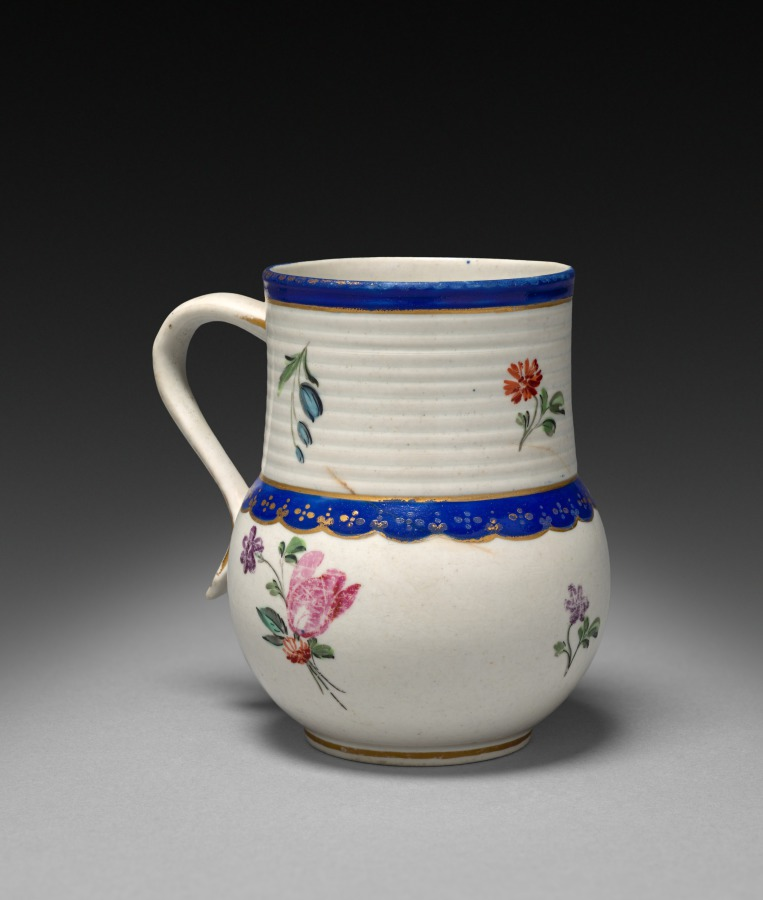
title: Duseberry Cream Pot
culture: England, Derby, 18th century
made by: Derby Porcelain Factory (Chelsea-Derby Period, 1770–84)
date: c. 1770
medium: soft-paste porcelain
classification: Ceramic